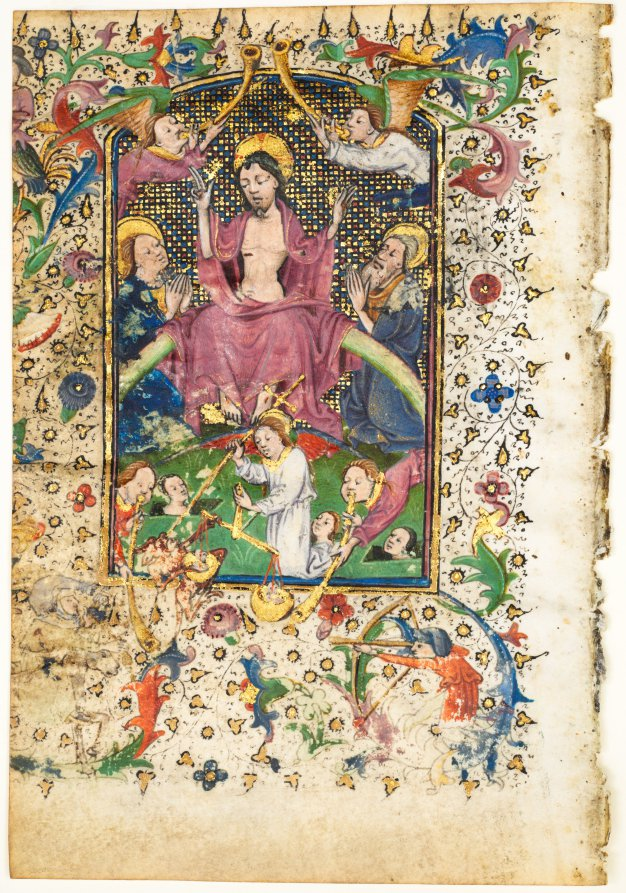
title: Leaf from a Book of Hours: The Last Judgment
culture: Flanders, Ghent (?), 15th century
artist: Master of Guillebert de Mets (Flemish)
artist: and Workshop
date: 1430s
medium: ink, tempera and gold on vellum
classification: Manuscript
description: The Master of Guillebert de Mets is named after the scribe who records his name in an illuminated copy of the Decameron, made for Duke Philip the Good of Burgundy, and for which he contributed many of its miniatures. He was active from about 1410 to 1445. So far there is no proof that allows us to follow his career or to know precisely where he worked. Calendars in other manuscripts with which he is associated suggest his shop may have been in Tournai, Liège, Bruges, and more credibly, Ghent. His commissions may have been linked to the itinerant Burgundian court, though no original provenance survives for any of his manuscripts. The Master of Guillebert de Mets painted in an easily recognizable style. His figures have prominent heads with well-delineated eyes and small mouths, slender torsos with thin, spindly legs, and long, finely worked fingers. Many of his miniatures, such as the Crucifixion and the Last Judgment here, show that he often favored mosaic backgrounds of delicately worked checkered patterns.